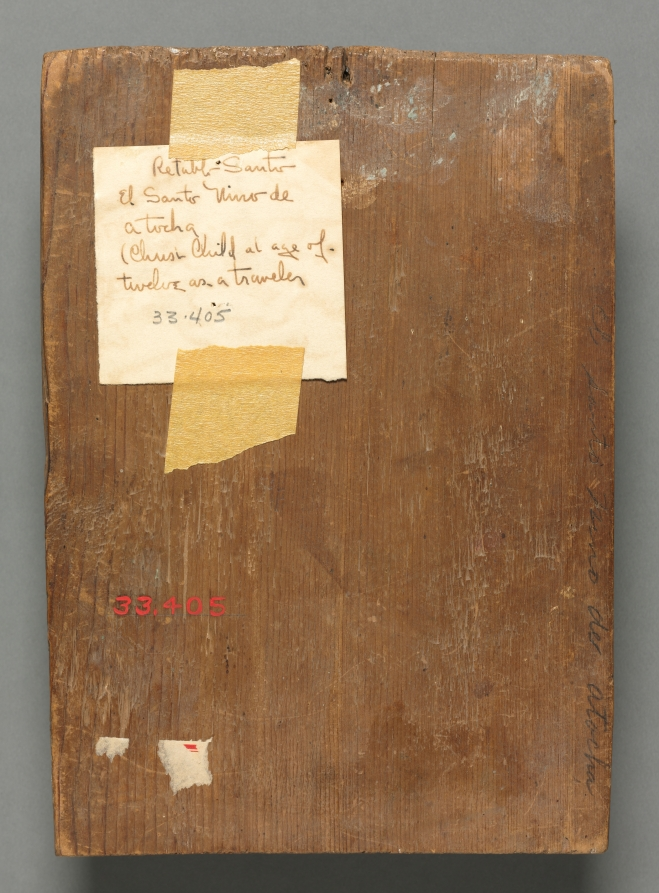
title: El Santo Nino de Atocha: santo de retablo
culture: America, New Mexico, 17th-18th century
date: 1600s-1700s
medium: oil on wood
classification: Painting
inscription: Lettering in black at bottom of panel above black border: "EL SENTISIMO NINI DE ATOCHA"